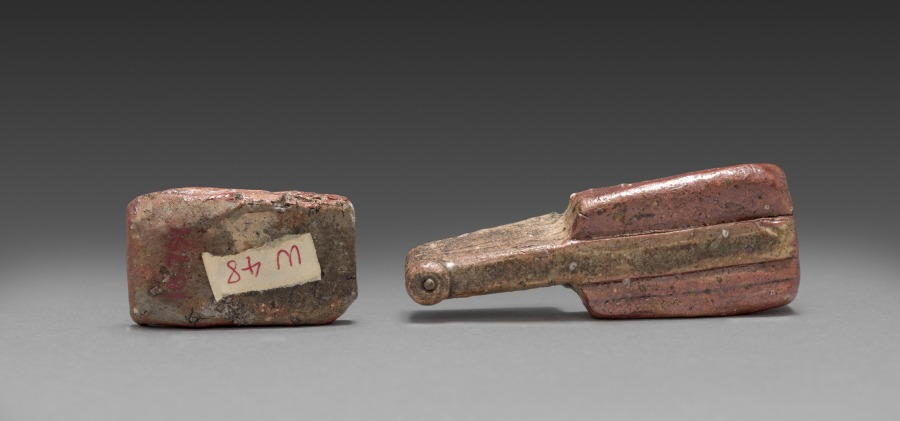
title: Ink Box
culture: Japan, Edo period (1615–1868)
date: early to mid-1800s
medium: pottery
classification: Ceramic